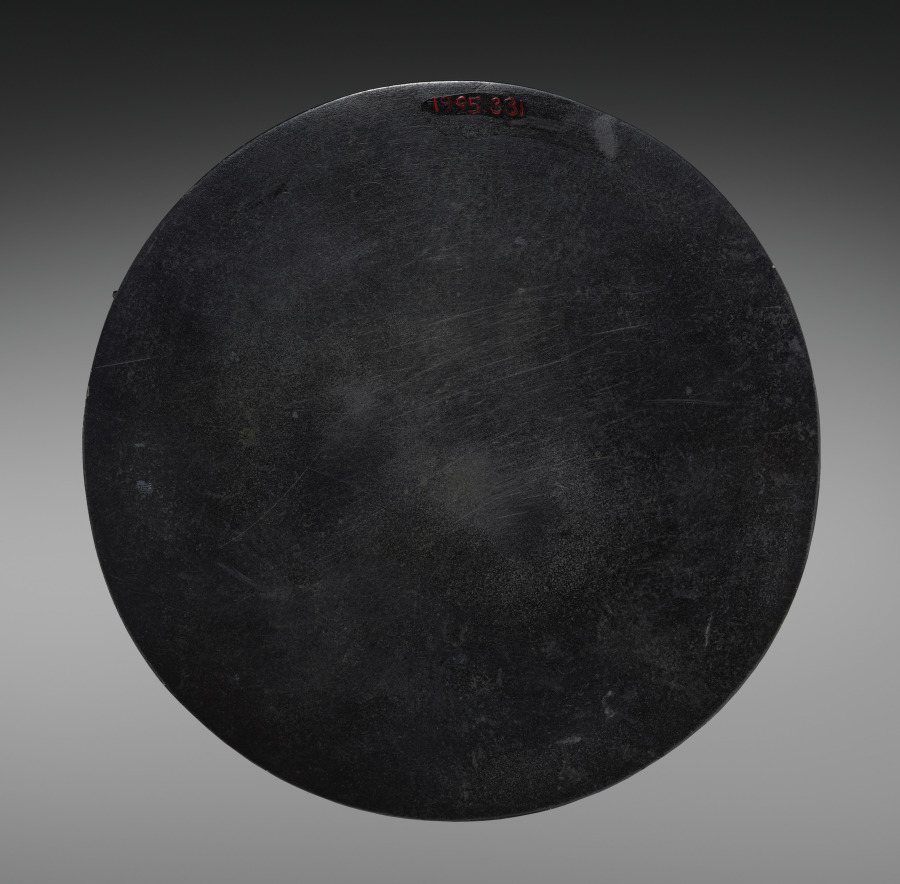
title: Mirror with Deities and Kings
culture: China, Eastern Han dynasty (25–220 CE)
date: 100s CE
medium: bronze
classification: Metalwork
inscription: Queen Mother; King Father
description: Decorated with historic figures from the former states of Wu and Yue, this mirror illustrates the rivalry between the states of Wu (around the Lake Tai basin) and Yue (around Hangzhou Bay) that eventually resulted in the defeat of Wu in 473 BCE. Its downfall became a story retold during the Han dynasty on mirrors from the Shaoxing era. During the relatively peaceful Han dynasty, the number of bronze mirrors used in burials and as gifts increased, as less metal was used for weaponry. Previously known for sword making and having rich metal resources, places like Shaoxing in Zhejiang province became centers of mirror production.